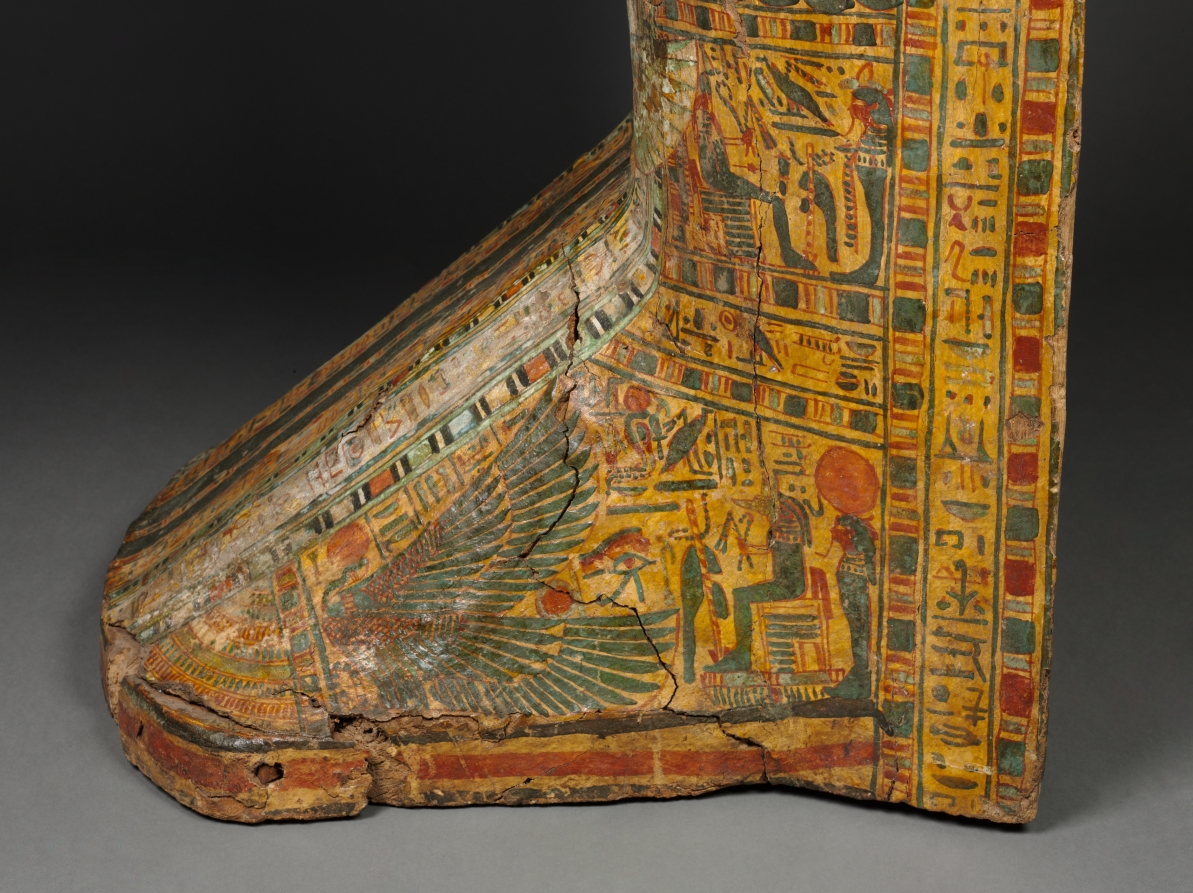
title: Coffin of Nesykhonsu (lid)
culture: Egypt, Third Intermediate (1069–715 BCE), Dynasties 21–22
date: c. 976–889 BCE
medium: gessoed and painted sycamore fig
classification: Funerary Equipment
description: A complete set of coffins during the late New Kingdom and Third Intermediate Period consisted of an outer and inner coffin and a mummy board (essentially a lid without a case, placed directly over the wrapped mummy). Judging by its size, this must have been Nesykhonsu's outer coffin. The type is essentially the same as the coffin of Bakenmut, which was also an outer coffin. The two coffins are said to have been found together and to have belonged to a man and wife. This is quite possible, although the inscriptions do not bear it out. Bakenmut is not mentioned on Nesykhonsu's coffin, nor is she mentioned on his. There was by this time a tremendous repertoire of scenes appropriate for coffin decoration. Whereas Bakenmut's coffin features images of deified dead pharaohs, Nesykhonsu's is decorated in a more personal way with scenes from her own funeral. The main scene in the interior (near the top) shows a priest clad in a panther skin with the mummy of Nesykhonsu behind. The god appears in mummy form and wears a sun disk on his head. The scarab beetle inside the sun disk identifies him as Khepri, the morning sun, and the hieroglyphs to the right identify him as Atum, the evening sun. Taken together, image and text represent the sun god in both his rising and setting, youthful and aged aspects.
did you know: Two of Nesykhonsu's titles, "Lady of the House" and "Singer of the Choir of Mut the Great," are written on the outside of the coffin.